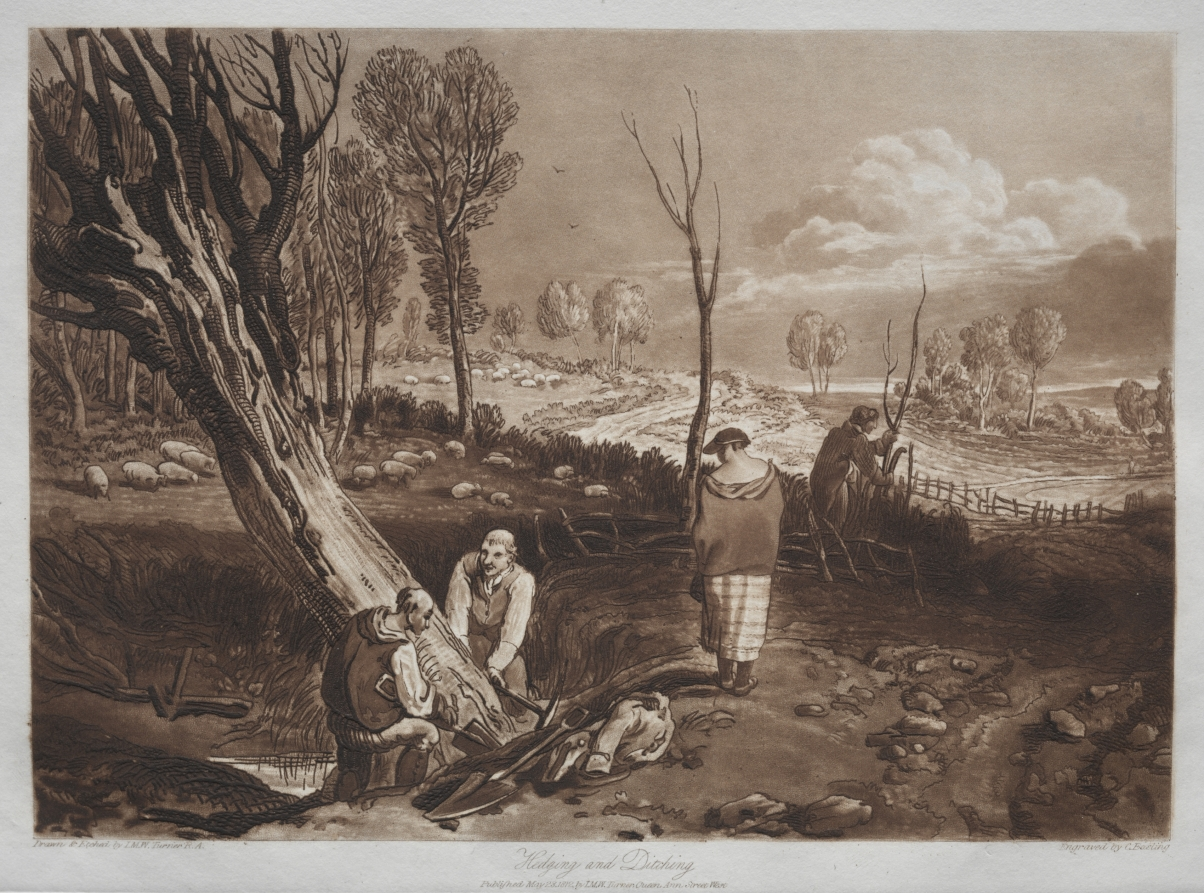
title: Liber Studiorum: Hedging and Ditching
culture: England, 19th century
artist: Joseph Mallord William Turner (British, 1775–1851)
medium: etching and mezzotint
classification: Print